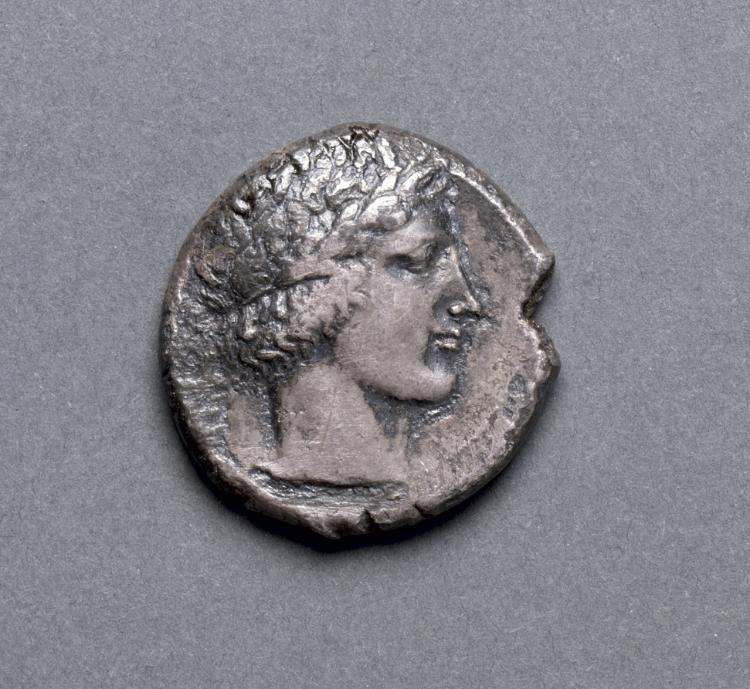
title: Tetradrachm: Head of Apollo, laureate (obverse)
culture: Greek, minted at Leontinoi (Sicily)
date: 466–422 BCE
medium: silver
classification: Coins